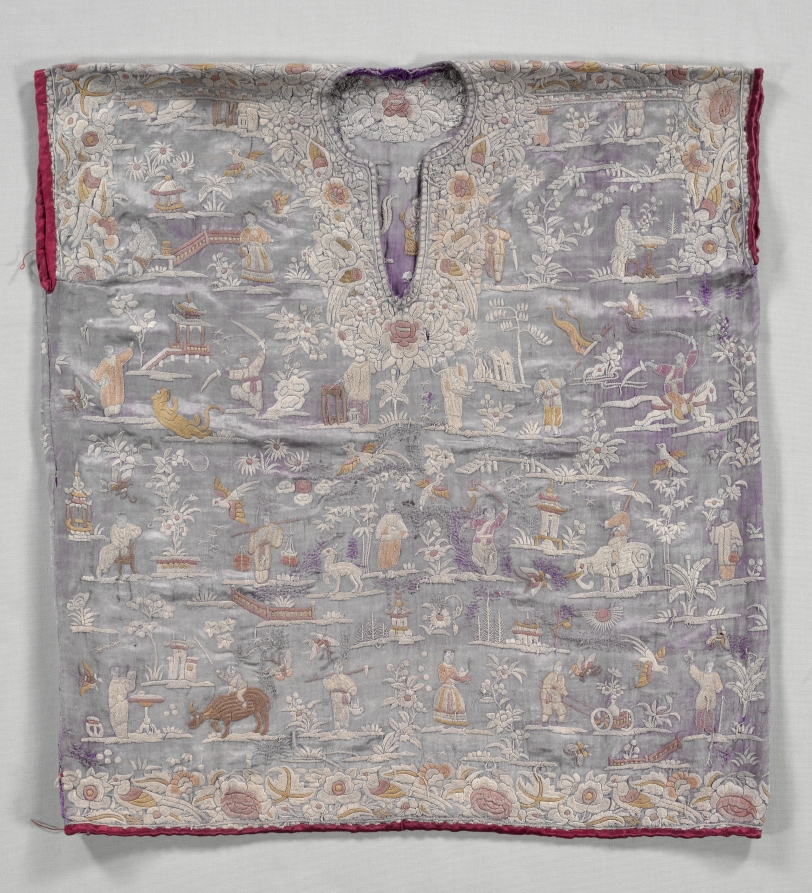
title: Blouse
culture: China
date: late 1800s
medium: embroidery, silk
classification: Garment